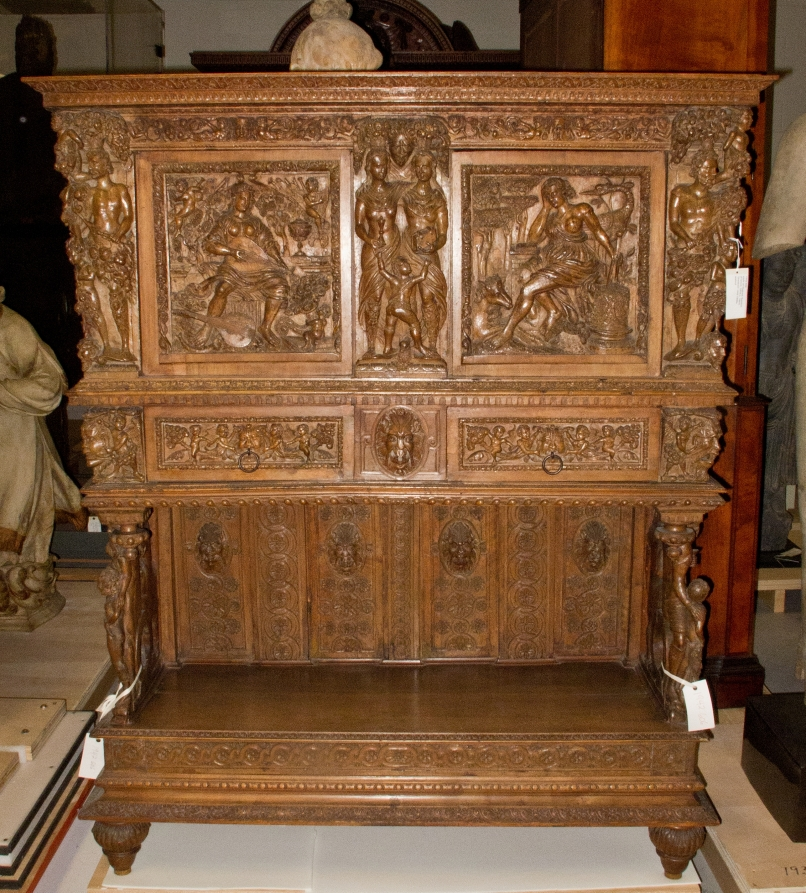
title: Dressoir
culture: France, Burgundy, 16th century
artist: style of Hugues Sambin (French, 1518–c. 1601)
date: mid 1500s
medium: walnut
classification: Furniture and woodwork